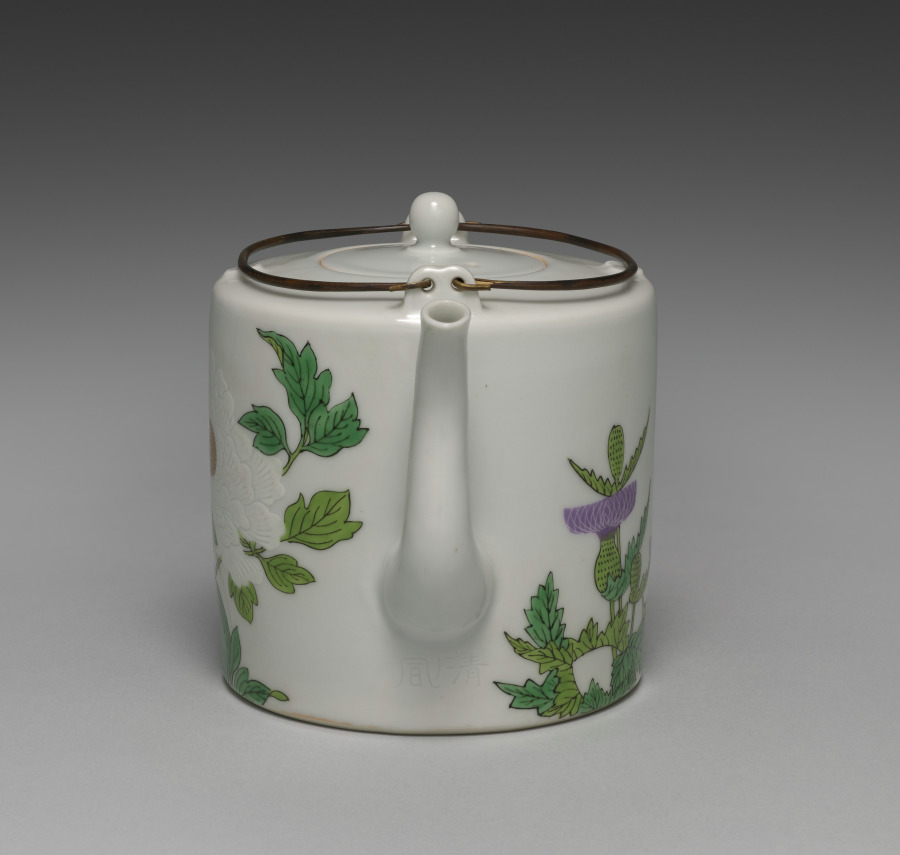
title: Sake Pourer with Flowers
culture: Japan, Meiji period (1868–1912)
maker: Seifū Yohei III (Japanese, 1851–1914)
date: 1893–1914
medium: Porcelain with molded design, overglaze color enamel, and metal handles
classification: Ceramic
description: This sake pourer is of a type called a chōshi. It is elaborately decorated with flowers in overglaze enamels in several colors, including black for the contour lines of leaves and stems; orange, white, gold, and two shades of green for the peonies; and purple for the thistles. The white blossoms have been built up with white enamel, then incised for a white-on-white eect; the orange and purple use an absence of color to produce the contours of individual petals. Yohei III referred to his works in multicolor overglaze enamels as “hundred flower brocades” (hyakka nishiki). Two small nyoi (C. ruyi) staff-head motifs, molded in clay and applied to either side of the lid, create handle rests, as well as natural places for the thumb and index finger of one hand to rest, so one can both secure the lid and steady the pour, while the handles are held in the other hand. The top of a nyoi staff resembles the curled cap of the reishi. Such scepters are imagined to be found in the hands of sages, Daoist immortals, or Buddhist deities and connote lofty goings-on and favorable circumstances. Since this sake pourer is unsigned, it may have been made for imperial family members to give as a gift.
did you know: This sake pourer with purple thistles and orange peonies shows off Seifū Yohei III’s technique of enamels painted over the glaze.